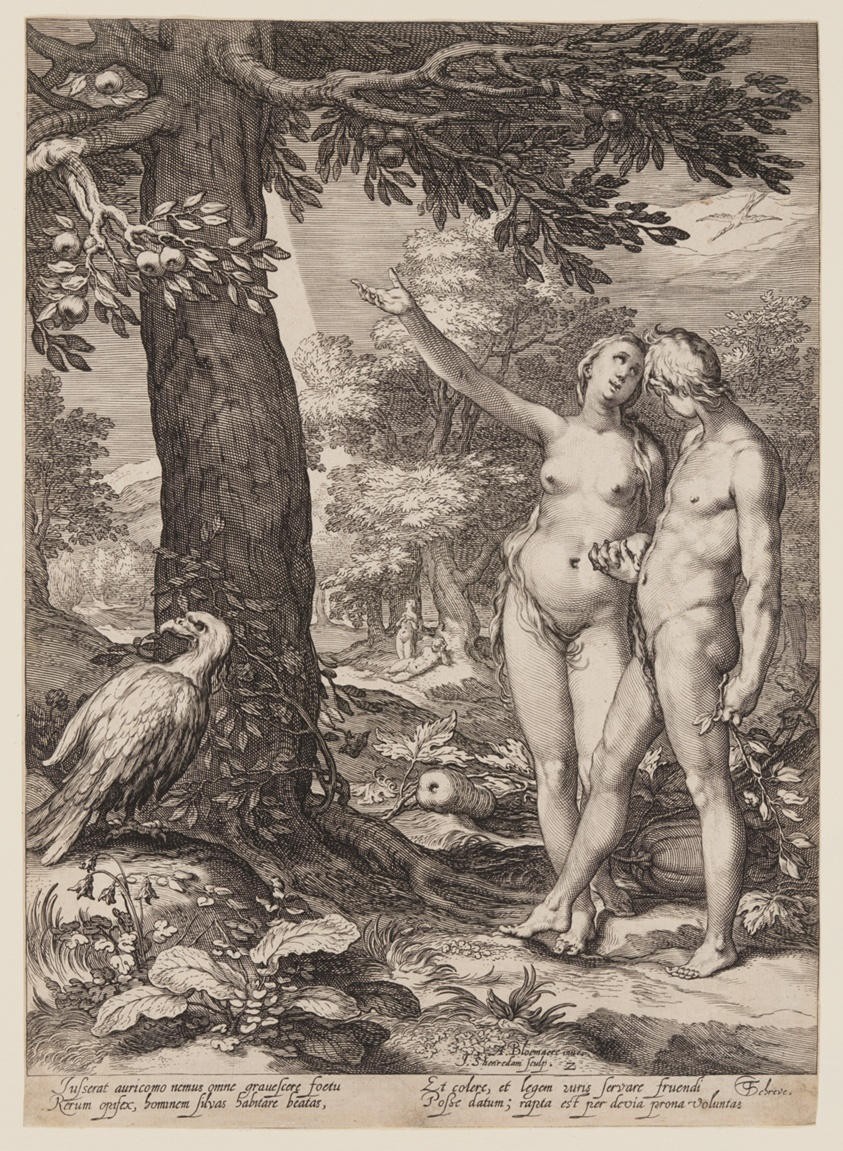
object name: Print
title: Adam and Eve before the Tree of Knowledge, from History of the First Parents of Man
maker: Jan Saenredam (Dutch, 1565–1607); after Abraham Bloemaert (Dutch, 1566–1651)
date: 1604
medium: Engraving on ivory laid paper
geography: Netherlands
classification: engraving; paper; print; prints and drawing